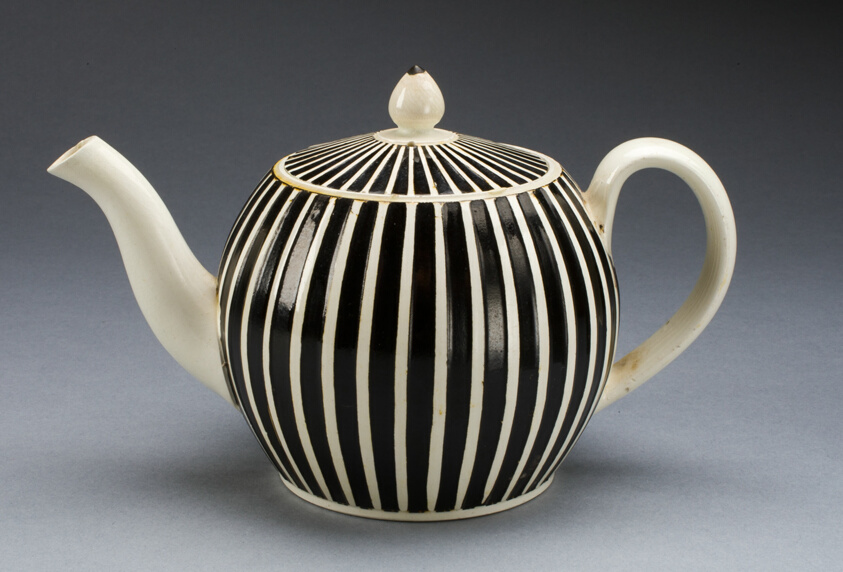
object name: Ceramics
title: Teapot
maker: England, probably Leeds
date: c. 1780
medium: Lead-glazed earthenware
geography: Leeds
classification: teapot; earthenware; creamware; ceramics; lead-glazed earthenware; european decorative arts